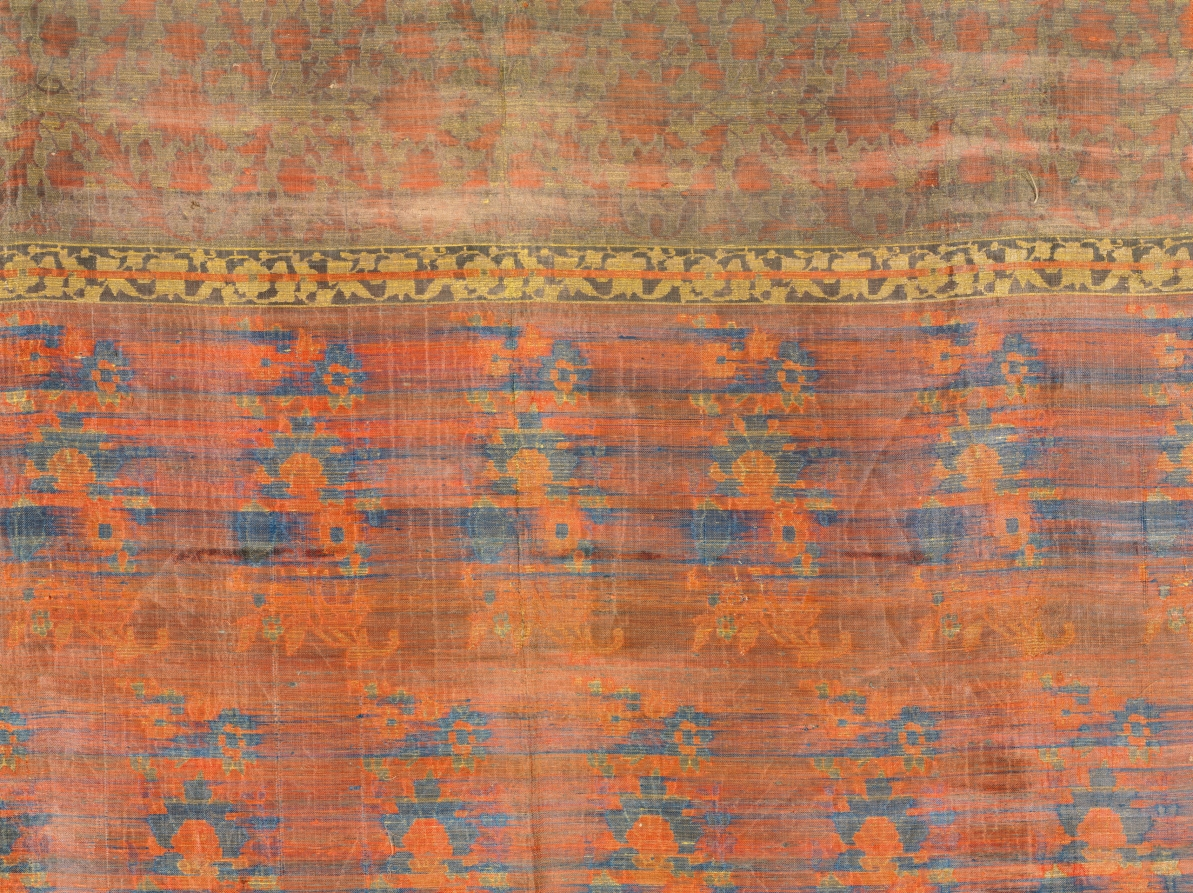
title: Velvet fragment from a palace curtain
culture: Iran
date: 1700s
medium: taquete silk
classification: Textile